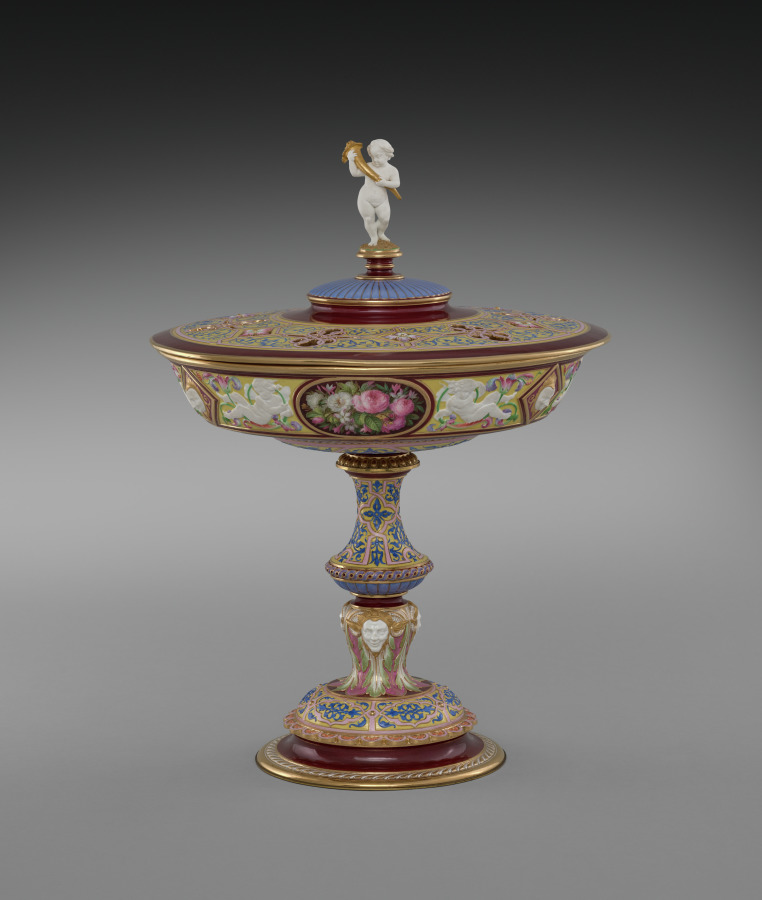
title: Standing Cup and Cover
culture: France, Sèvres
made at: Sèvres Porcelain Factory (French, est. 1756)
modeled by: Hyacinthe-Jean Regnier (French, 1803–1870)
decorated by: Francois-Hubert Barbin (French, 1786-)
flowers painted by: Jacques-Nicolas Sinsson (French)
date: 1844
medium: porcelain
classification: Ceramic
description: The official French porcelain factory at Sèvres has always been one of Europe's most important ceramic manufacturers, famous for its decorative pieces as well as more utilitarian wares. This vase in the Renaissance style, its design inspired by 16th-century French examples, is clearly in the tradition of elaborately conceived and decorated pieces intended for use by the French court or as presentation pieces by its monarchs. The latter was the fate of this Covered Cup, acquired in 1846 by Queen Marie-Amélie d'Orleans, the wife of Louis-Philippe, king during the July Monarchy (1830-48). Soon thereafter the vase was presented to a now unknown person. It is one of four pieces of this design made at the Sèvres factory, and the only one known today to have survived.